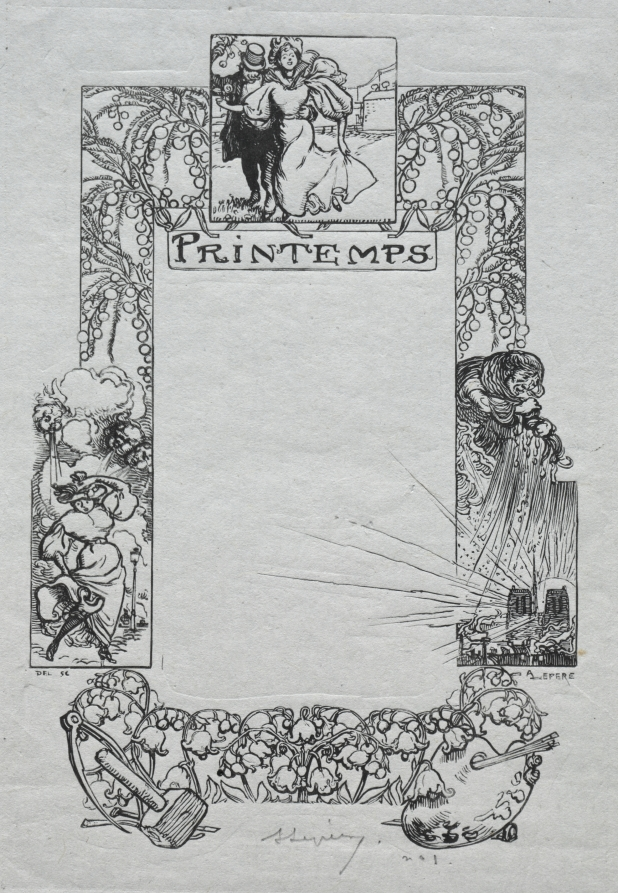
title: Paris Almanac, 1897: Decorative Border, Spring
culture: France, late 19th Century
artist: Auguste Louis Lepère (French, 1849–1918)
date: 1897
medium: wood engraving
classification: Print